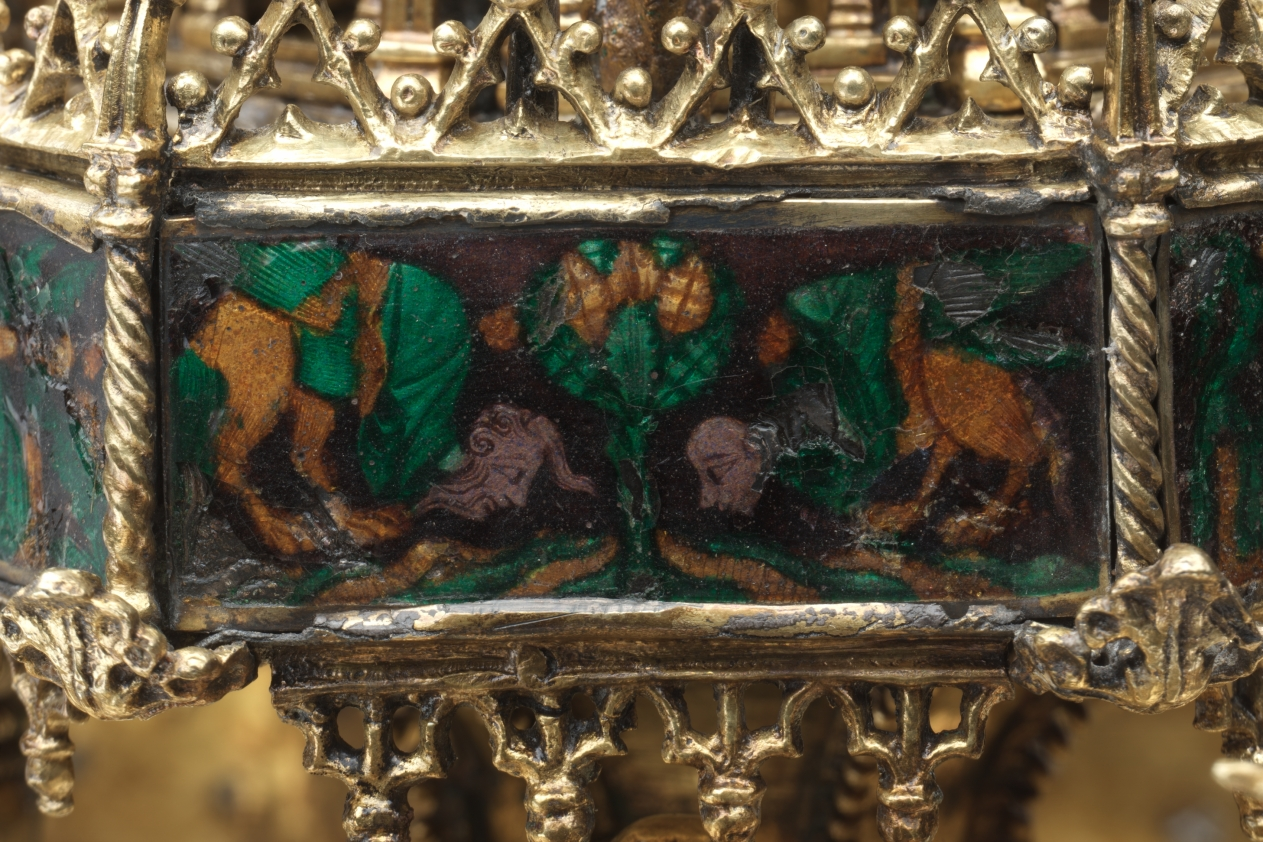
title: Table Fountain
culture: France, Paris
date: c. 1320–40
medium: gilt-silver and translucent enamels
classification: Metalwork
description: Conceptually and stylistically, this object is beyond all else a piece of Gothic architecture in miniature with vaults, pinnacles, columns, and traceried arches. Though the artist who created it is unknown, he was unquestionably inspired by the great Gothic buildings of his time. The table fountain is a three-tiered assembly combining cast elements with bent sheets of gilt-silver. To these have been attached a series of enamel plaques representing grotesque figures, some of which play musical instruments. Water wheels and bells were added to capture motion and sound. The rich detail, precious materials, and involved ornamentation of this deluxe object suggest it would have been expensive to produce and highly treasured by its original owner, someone of high status, and would have been deployed as an object of spectacle. This is the most complete example of its type known to survive from the Middle Ages. Medieval inventories reveal that small fountains like this, often taking various forms, and generally made from precious metals, once existed in large numbers, thus making the Cleveland table fountain an extremely rare object.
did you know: This fountain with its minute architectural details and finely made enamel plaques displayed the wealth and refinement of the owner as it entertained his guests. Imagine hearing the ringing of the tiny bells when this fountain was in use.